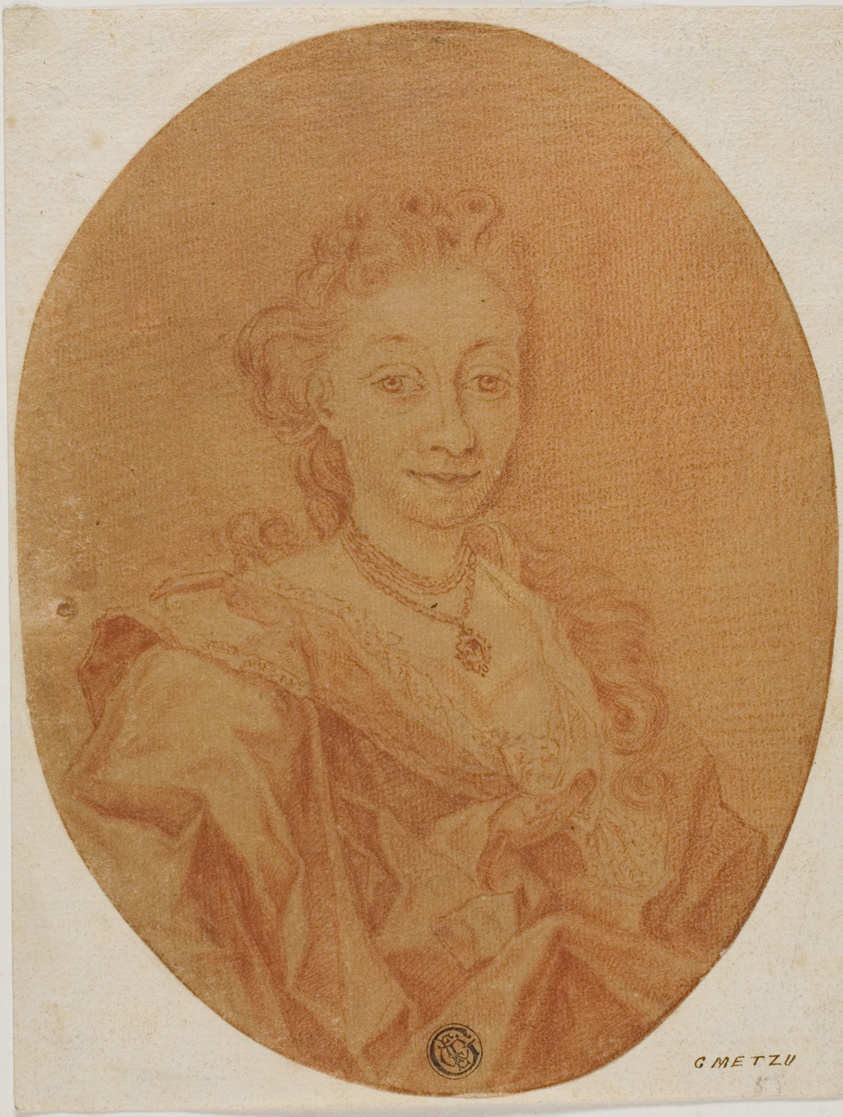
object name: Drawing and Watercolor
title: Portrait of a Woman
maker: Possibly after Gabriel Metsu; Dutch, 1629-1667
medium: Red chalk, with stumping and traces of black chalk, on tan laid oval paper, laid down on ivory laid paper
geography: Holland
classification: chalk; drawings (visual works); prints and drawing